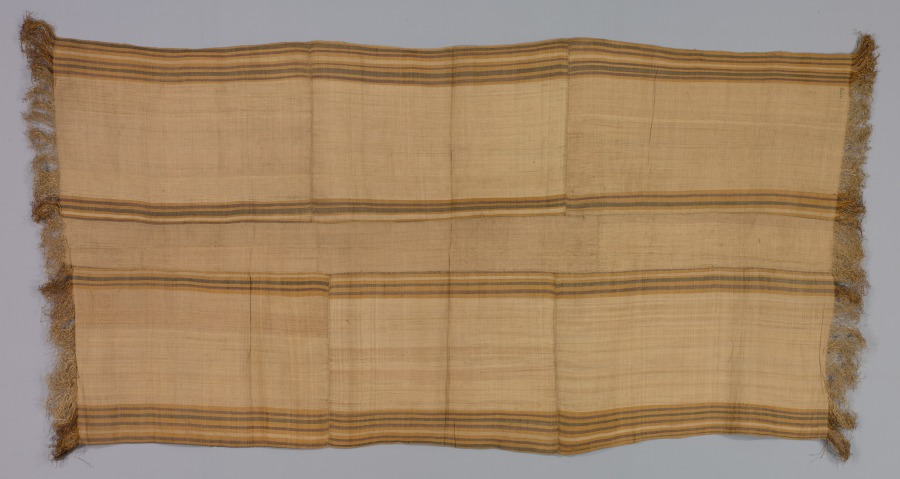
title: Cloth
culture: Africa, Central Africa, probably Democratic Republic of Congo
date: before 1921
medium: Raffia and dye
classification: Textile